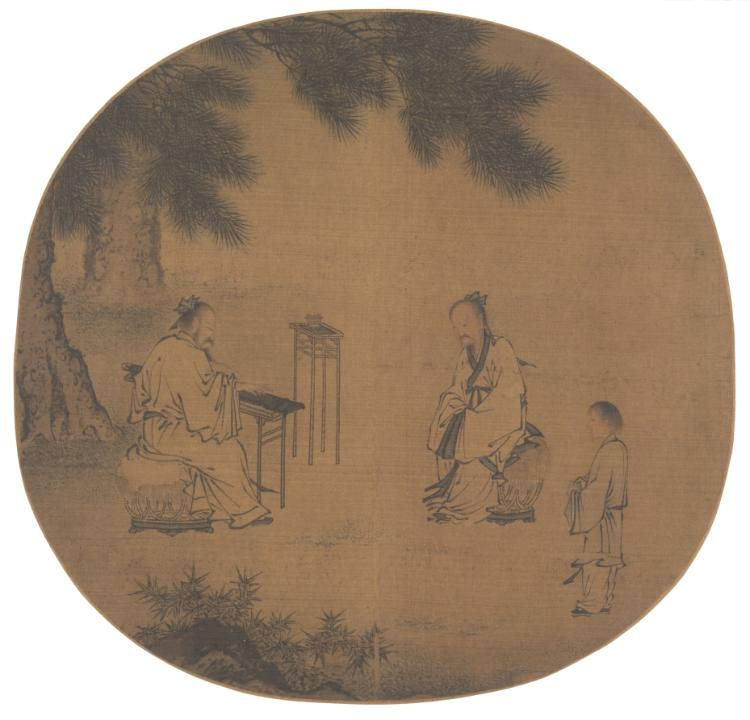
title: Listening to the Qin (Zither)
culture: China, Southern Song dynasty (1127-1279)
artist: Liu Songnian (Chinese, c. 1150-after 1225)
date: 1150–after 1225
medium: Album leaf; ink and slight color on silk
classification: Painting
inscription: 劉松年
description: Listening to the Qin recalls the story of Bo Ya, a musician who loved to play the qin (a seven-stringed zither) for Zhong Ziqi, who was a discerning listener. The cool shade of the pine trees and the incense wafting from the burner complemented the atmosphere created by the music. After Zhang died, Bo refused to play the instrument ever again. The intimate format of the album leaf focuses on the music as the key to stir the heart and soul of both player and listener.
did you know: The three figures are painted with "nail-head and mouse-tail" brushstrokes.